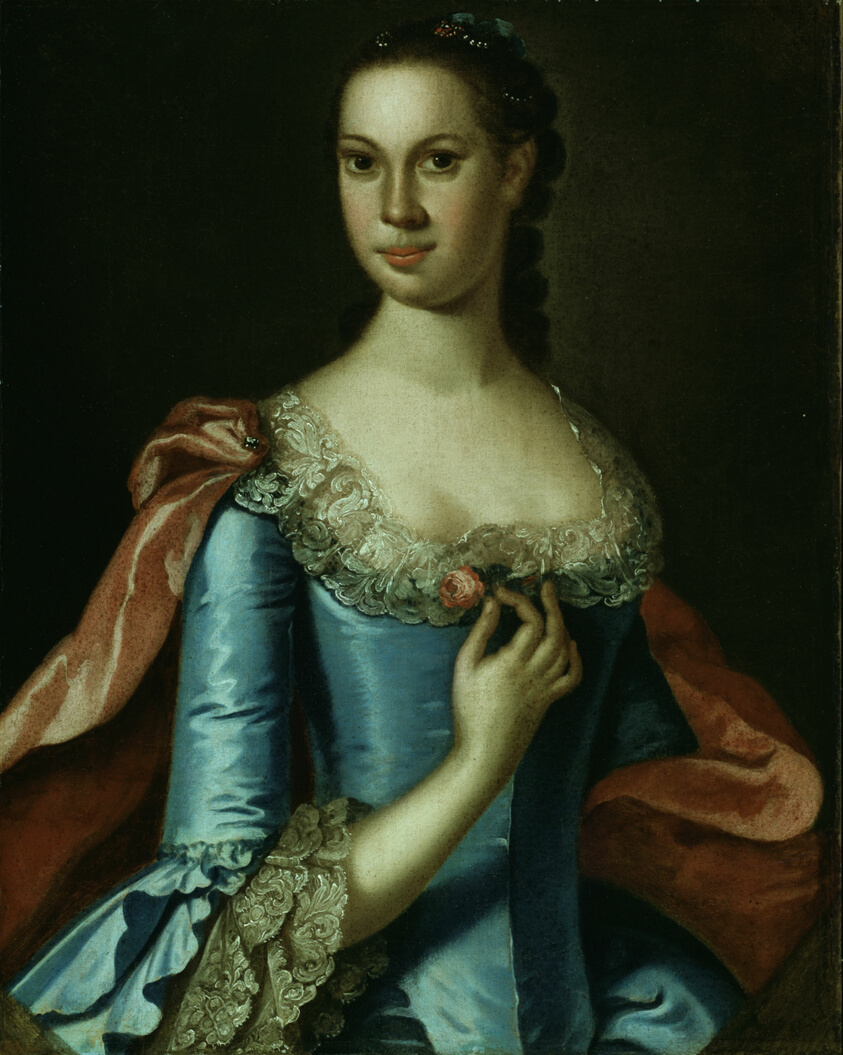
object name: Painting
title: Mrs. William Carmichael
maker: John Hesselius (American, 1728–1778); Formerly attributed to Jeremiah Theus (American, 1719–1774)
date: 1764–78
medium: Oil on canvas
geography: United States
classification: painting; american arts